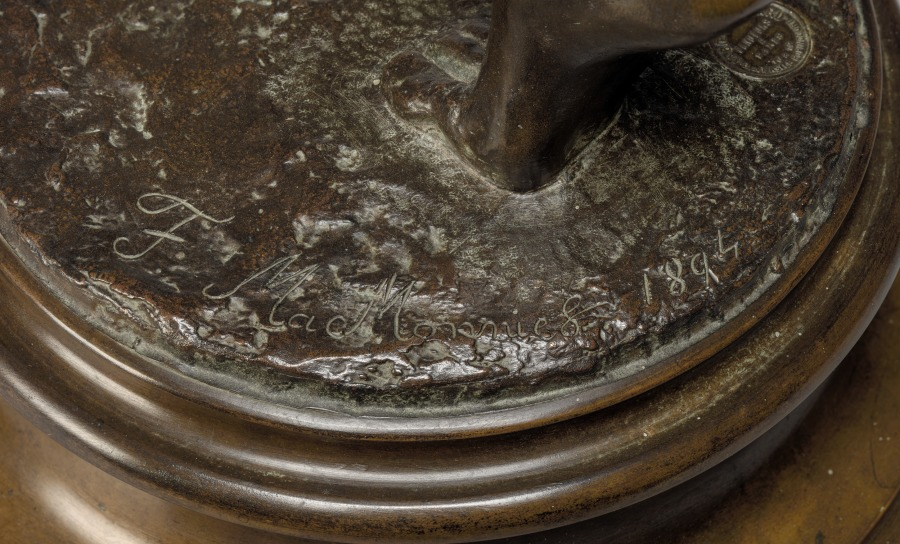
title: Bacchante and Infant Faun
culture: America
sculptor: Frederick William MacMonnies (American, 1863–1937)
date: 1894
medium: bronze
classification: Sculpture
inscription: Signed on base: F. Macmonnies, 1894.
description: This sculpture is a smaller version of a three-quarter life-size bronze given by the artist to Charles McKim, the architect for the Boston Public Library who placed the statue in the fountain of the library's courtyard. Although the vast majority of Bostonians supported the statue, a small but powerful group denounced it as "debauched," "vice-ridden," and "treason to purity and sobriety and virtue, and Almighty God." The opponents included the Boston Brahmins—a group of Anglo-Saxon, Protestant elite—and various religious, temperance, and antivice organizations. Feeling threatened by the swell of immigrants and by the changing roles of women, these groups hoped that the library would offer an alternative to the saloons frequented by Boston's lower classes. But a statue of a nude woman reveling under the effects of wine from the Roman god Bacchus only devalued this bastion of civilization. Consequently, the Boston Art Commission rejected the statue in 1897. However, in 1992 Boston's Art and Humanities commissioner and the library trustees returned a version of the original to the courtyard without public protest.